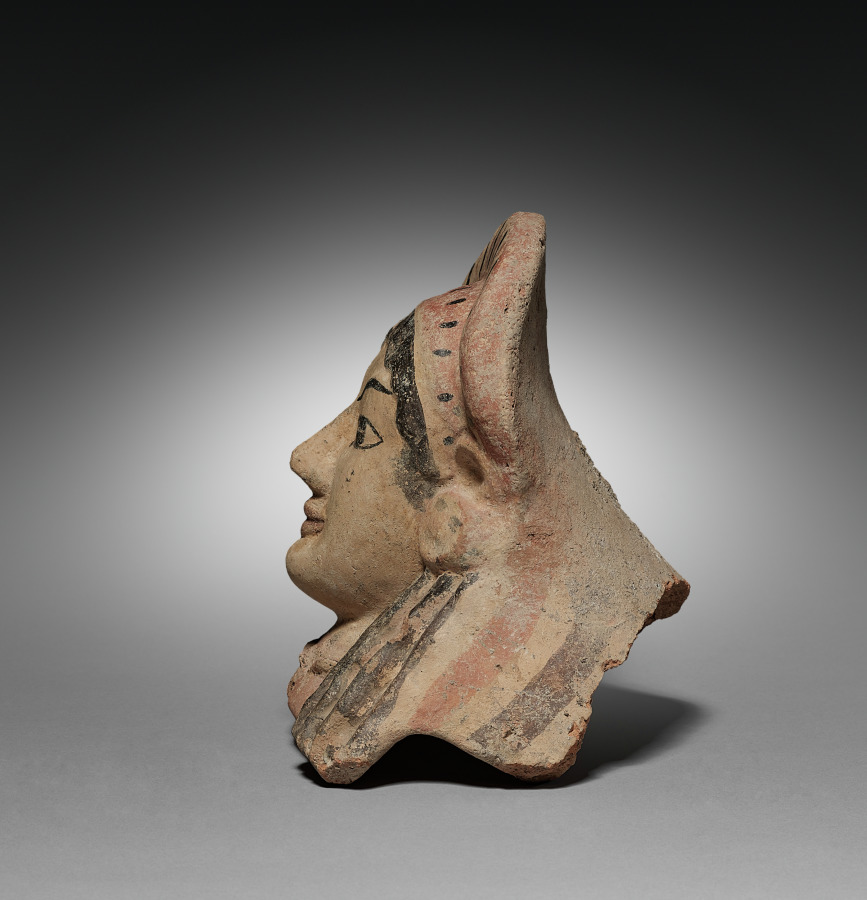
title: Antefix in the Form of a Maiden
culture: Etruscan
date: late 500s–early 400s BCE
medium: Painted terracotta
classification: Sculpture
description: Staring out with almond-shaped eyes and enigmatic smile, this brightly painted female head hides a rounded back made to serve an important function. She is a molded terracotta antefix, made to cap an open-ended roof tile along the sloping edge of a wooden building. Depending on the size of the structure it adorned, this antefix may have sat alongside dozens of others, likely all similar in form and painted decoration, and perhaps accompanied by additional polychrome architectural sculpture. Sometimes identified as maenads, the female followers of Dionysos (Etruscan Fufluns), such figures might also be nymphs or anonymous maidens.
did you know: Much Etruscan architectural sculpture was molded terracotta rather than carved stone.